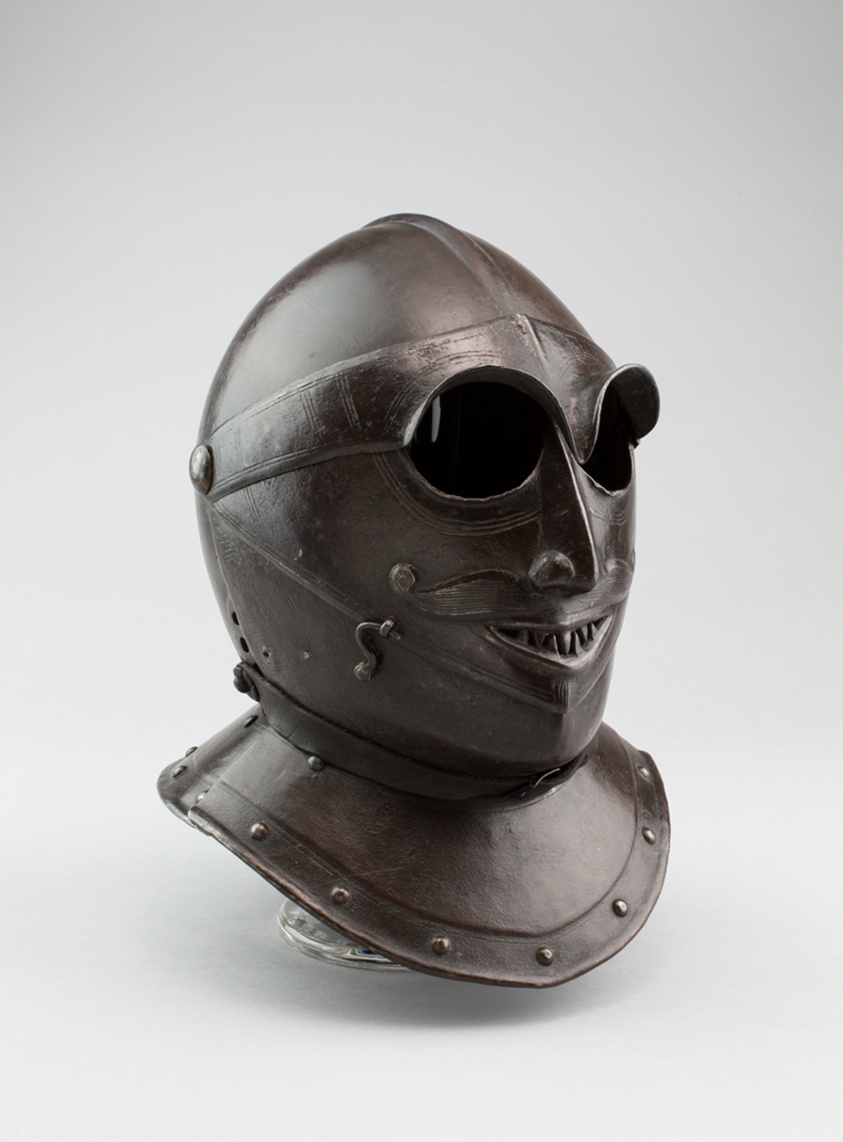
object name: Armor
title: Closed Burgonet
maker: Italian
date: 1600/10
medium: Steel and leather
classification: arms and armor; armor